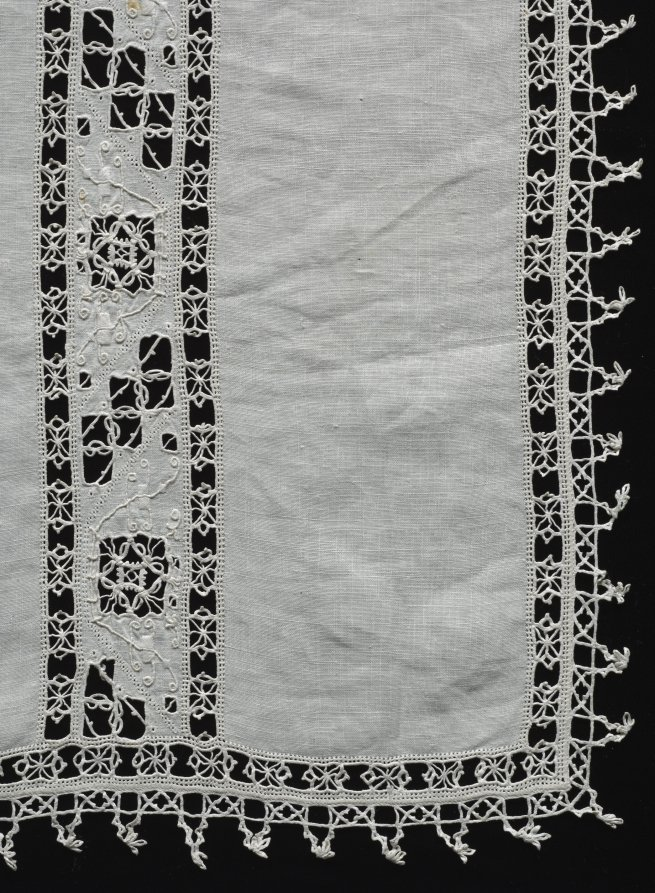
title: Lace Cloth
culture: Italy, Venice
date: 1500s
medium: Linen: needle lace (cutwork) and bobbin lace edging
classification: Lace